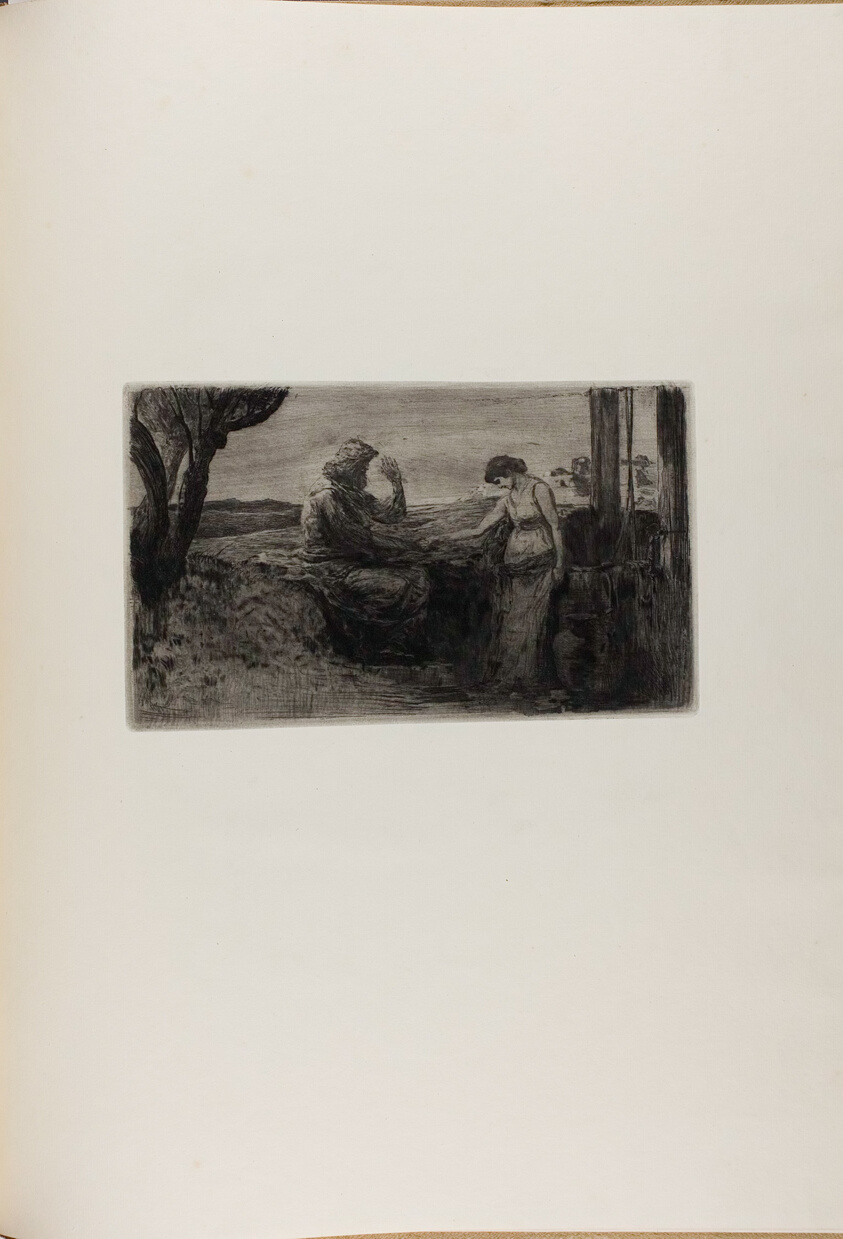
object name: Print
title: Christ and the Samaritan Woman, from A Life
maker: Max Klinger (German, 1857-1920); printed by Otto Felsing (German, 19th century)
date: 1884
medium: Drypoint and aquatint, with etching on ivory China paper, laid down on cream laid paper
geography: Germany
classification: drypoint; print; prints and drawing